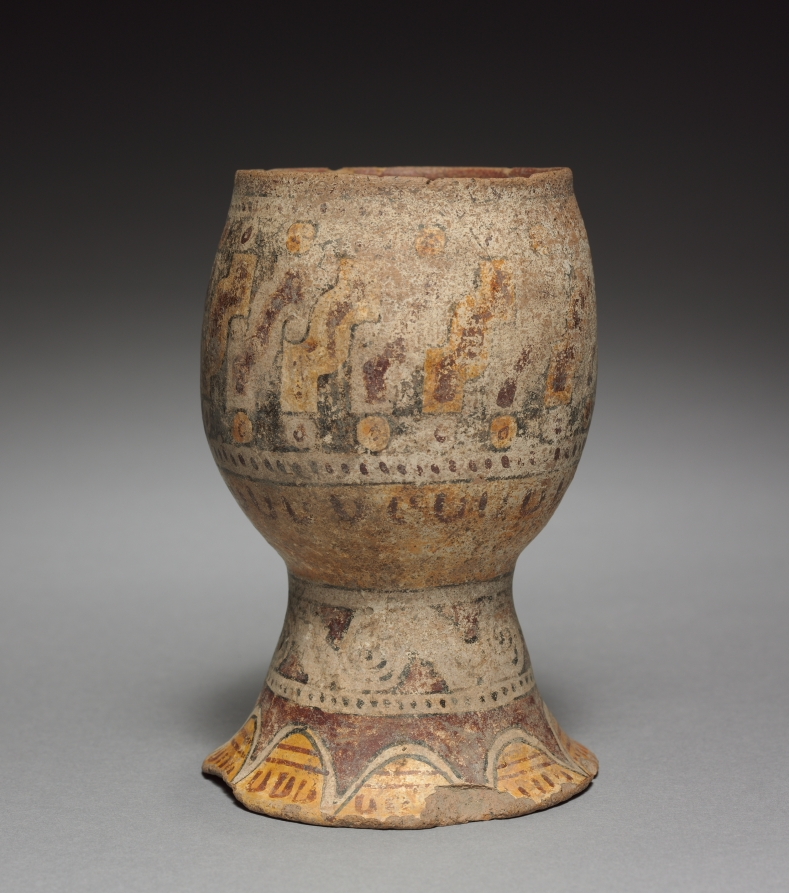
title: Drinking Cup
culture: Mexico, Cholula(?), Mixteca-Puebla style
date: 900–1519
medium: pottery with burnished, colored slips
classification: Sculpture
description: After about the year 800, several Mixtec kingdoms developed in the regions known today as Oaxaca and Puebla in southern Mexico. Mixtec artists excelled in creating small-scale, fine works of art, including polychrome pottery. A Mixtec noble may have used this well-painted goblet to drink chocolate or pulque, a fermented beverage made from the sap of the maguey cactus.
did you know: Pulque, once the drink of gods and rulers, is now available in a can.